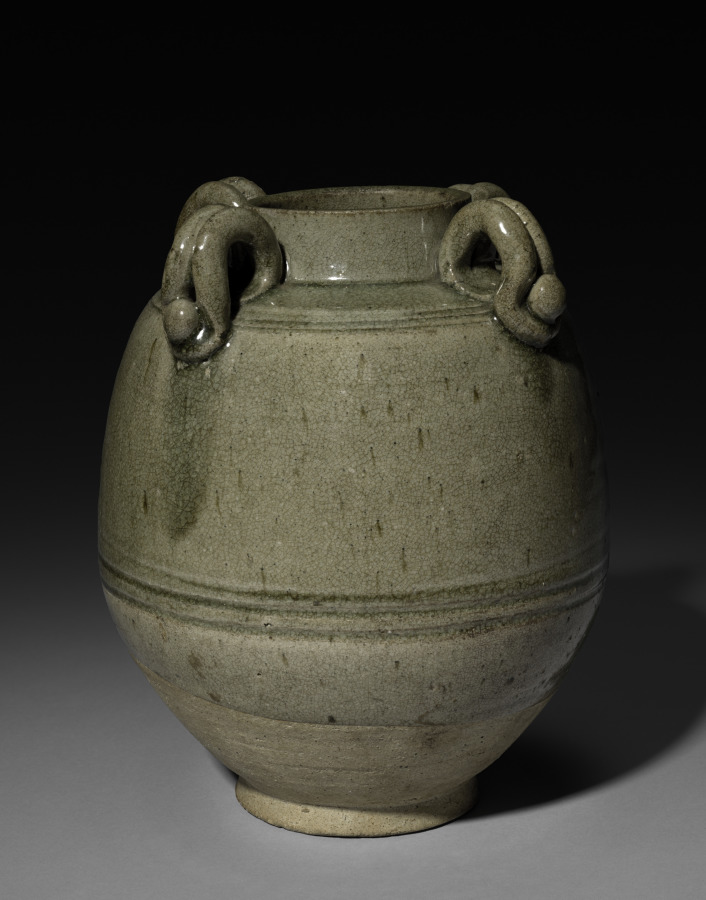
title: Jar with Four Loop-Handles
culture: China, Sui dynasty (581-618) - Tang dynasty (618-907)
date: 500s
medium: glazed gray stoneware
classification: Ceramic